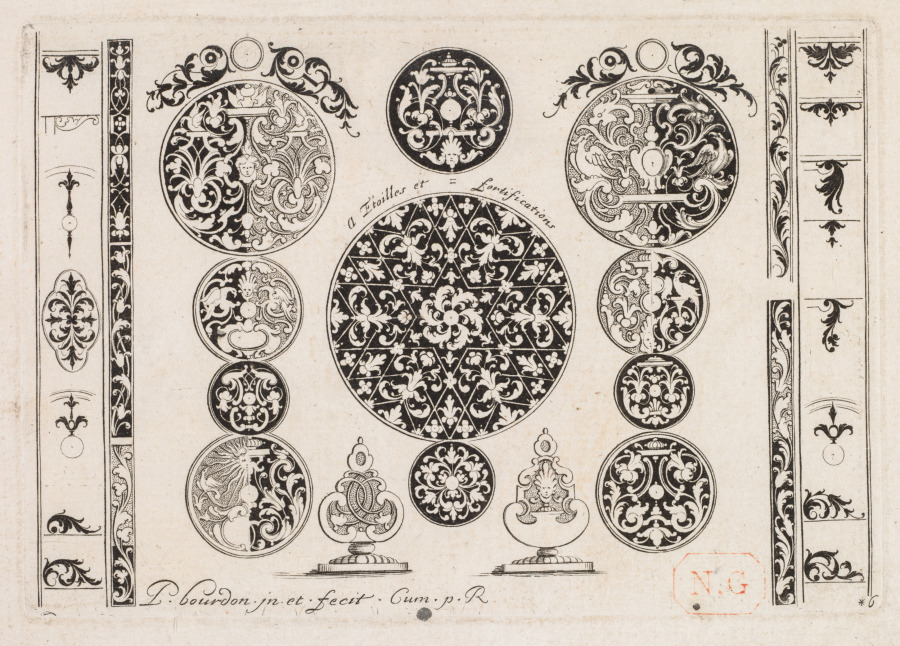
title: # 6 from " Livre second essais de gravjre " second book of Engraved Designs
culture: France, 18th century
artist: Pierre Bourdon (French)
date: c. 1703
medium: etching and engraving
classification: Print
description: The title page for this set of prints suggests that Bourdon’s designs are “useful for clockmakers, goldsmiths, chiselers, engravers and other people.” These craftsmen who made ornamented objects, such as the boxes and pistol below, sometimes consulted printed designs for inspiration. However, pattern prints similar to Bourdon’s also catered to aristocrats and wealthy professionals who pursued knowledge about styles and artists as a form of entertainment.